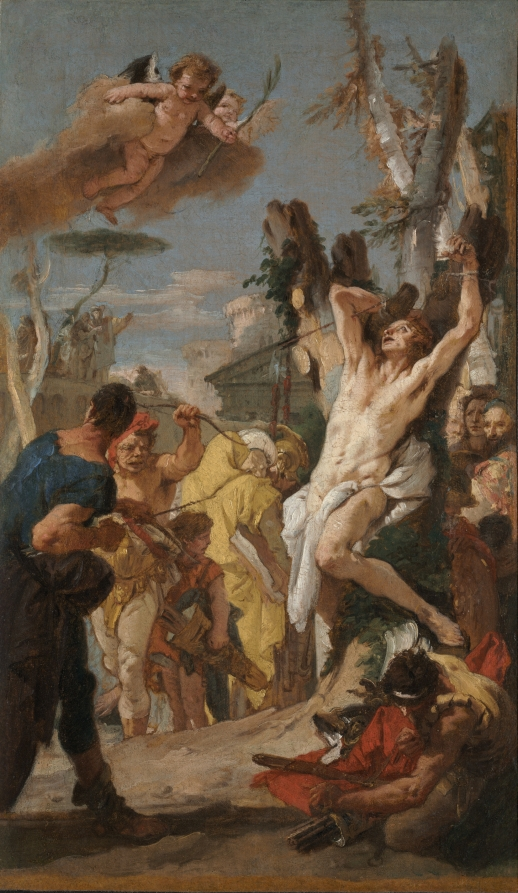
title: Study for "The Martyrdom of Saint Sebastian" (for the Augustinian monastery at Diessen, Germany)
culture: Italy, 18th century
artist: Giovanni Battista Tiepolo (Italian, 1696–1770)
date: 1739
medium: oil on canvas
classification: Painting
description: In 1739 a pair of monumental altarpieces by two Venetian painters (Giovanni Battista Tiepolo and Giambattista Pittoni) were installed in a church in southern Germany, part of a carefully orchestrated decorative program that included architecture, painting, sculpture, and decorative stuccowork. This sketch is Tiepolo’s initial design for his altarpiece, submitted for approval before beginning the final work. With quick, assured brushstrokes, he represents the Christian martyr Sebastian bound to a tree and shot with arrows, flooded with radiant light to symbolize his devotion to his faith.